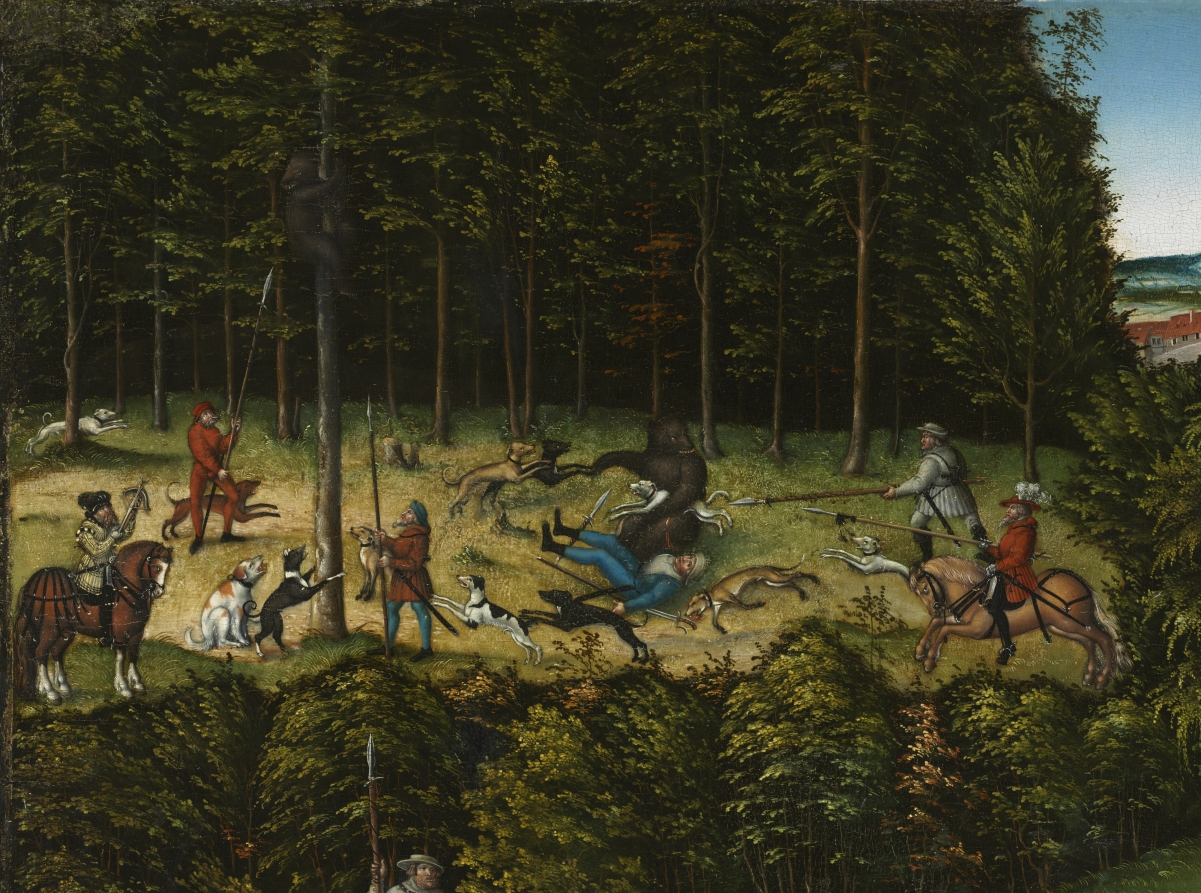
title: Hunting near Hartenfels Castle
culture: Germany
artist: Lucas Cranach (German, 1472–1553)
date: 1540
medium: oil, originally on wood, transferred to masonite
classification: Painting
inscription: Signed lower right on boat with a winged serpent, and dated: 1540 [inventory number, lower right: 1577]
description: The Protestant rulers of Saxony commissioned this animated hunt scene, set near their residence seen in the background, Hartenfels Castle (in eastern Germany). John Frederick the Magnanimous, in the bottom left corner, wears dark green hunting attire; he spans his crossbow and waits for his courtiers and dogs to chase a stag across the river. His wife, the Electress Sibylle, stands at right, poised to take the first ceremonial shot. The prince electors of Saxony were passionate practitioners of hunting with dogs—elaborate, highly rehearsed occasions, coordinated by the use of signals from hunting horns. Cranach dated this work and his signature is the winged snake at lower right. 1577 in the right corner is an inventory number.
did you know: Humans, dogs, and deer make up most of the creatures in this busy scene—but not all of them! Look closely at the background to spot a bear and three boars.